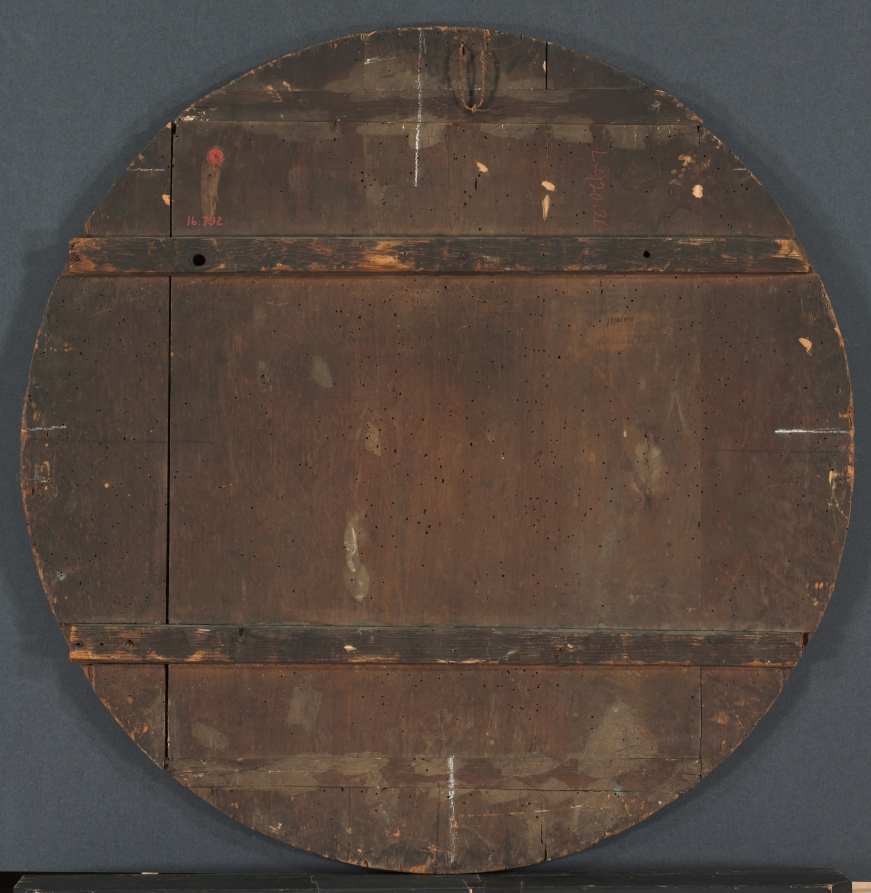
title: Virgin and Child with John the Baptist and Angels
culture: Italy, early 16th Century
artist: Pietro del Donzello (Italian, 1452–1509)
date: c. 1500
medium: oil on wood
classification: Painting